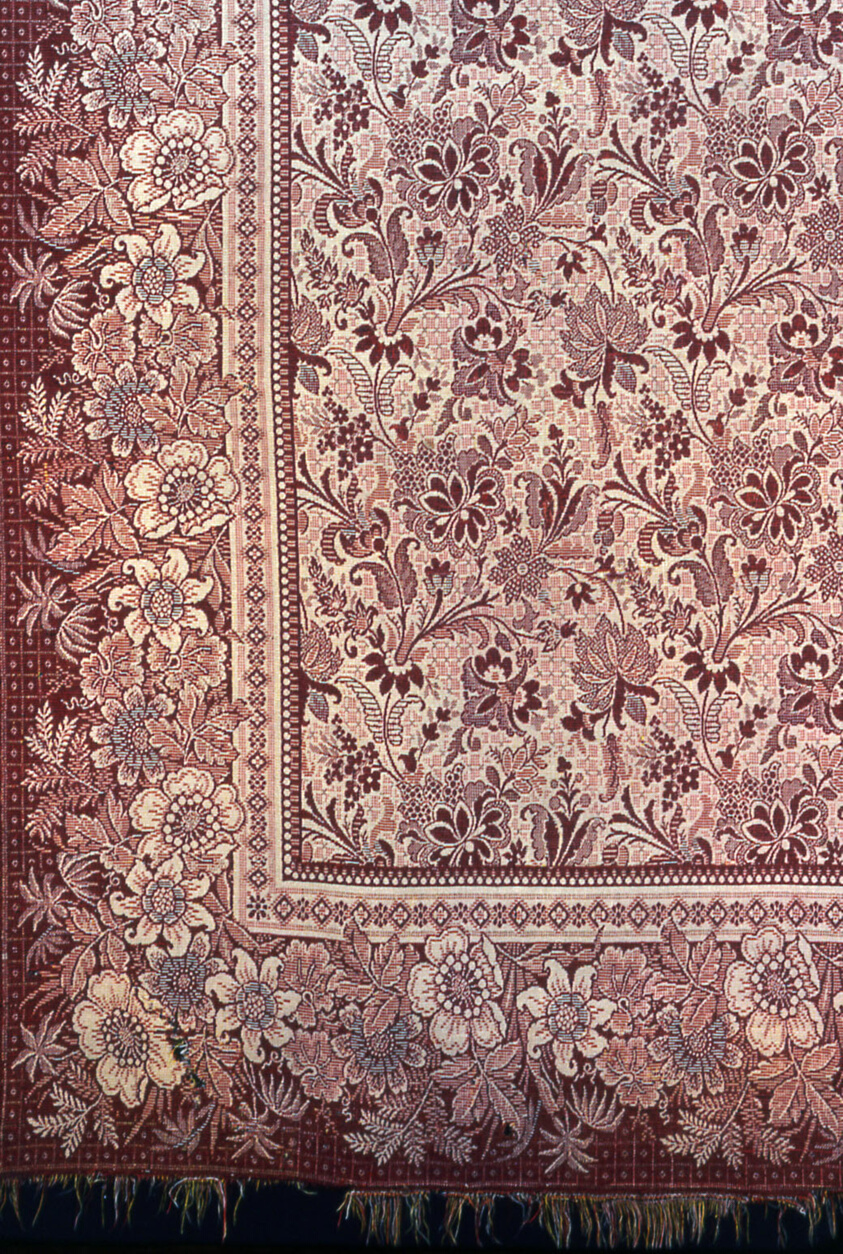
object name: Textile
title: Carpet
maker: Canada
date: 1830s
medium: Wool, plain weave; double cloth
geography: Canada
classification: weaving - carpet; textile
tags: flowers, foliage